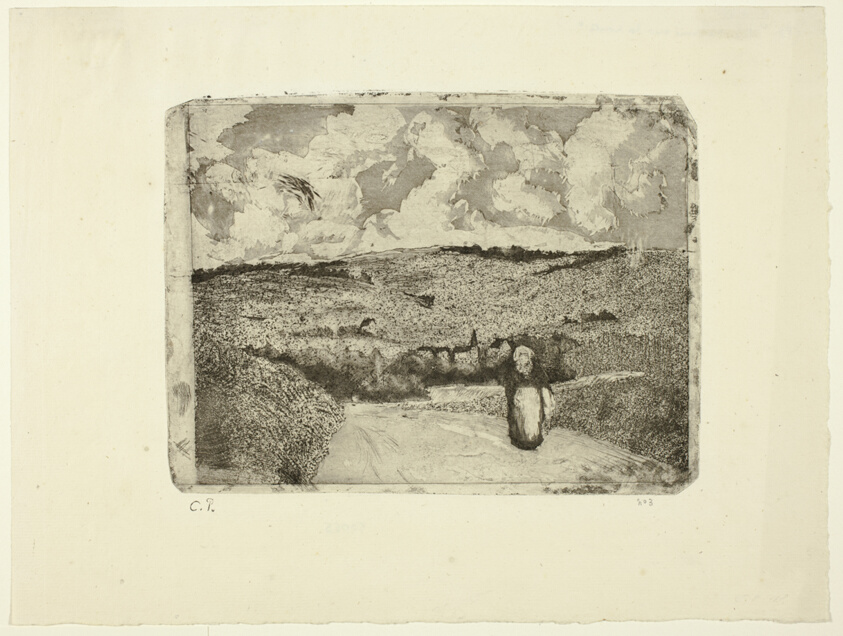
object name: Print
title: The Woman on the Road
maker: Camille Pissarro (French, 1830-1903)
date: 1879, printed 1923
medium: Aquatint, soft ground etching, and etching, with scraping and drypoint, in black on cream laid paper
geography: France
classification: etching; print; prints and drawing